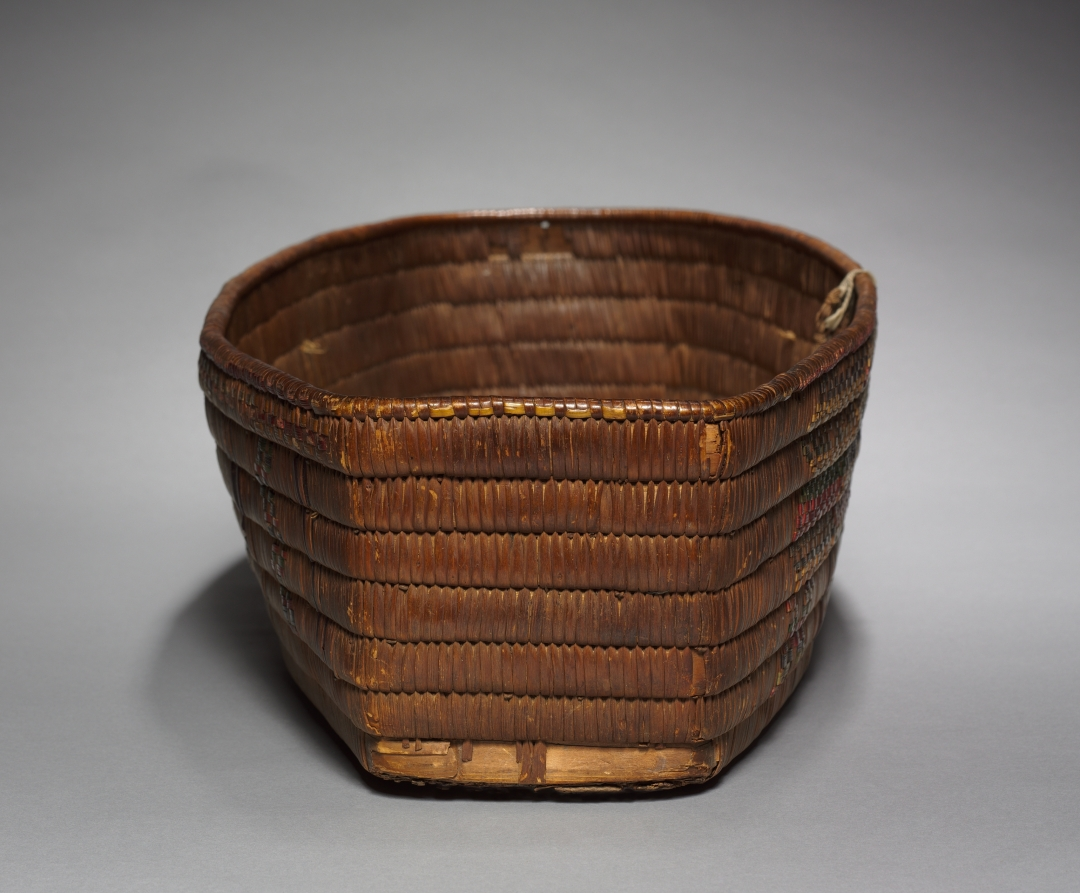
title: Baby Basket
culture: Northwest Coast, Frazer River, Salish, Late 19th century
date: c 1875– 1910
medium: basketry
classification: Basketry